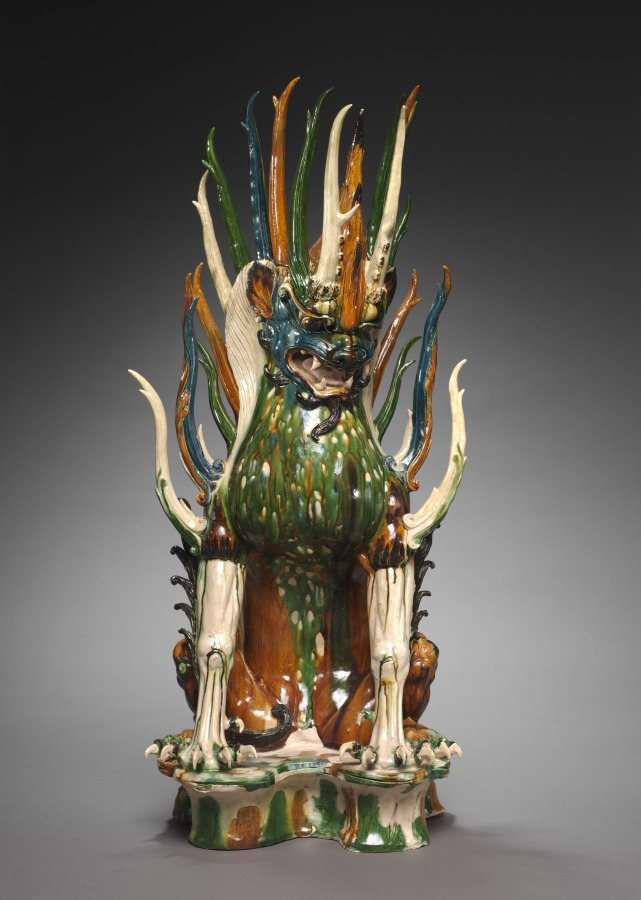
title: Tomb Guardians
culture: China, probably Shaanxi province, Xi'an, Tang dynasty (618-907)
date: early 700s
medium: glazed earthenware, sancai (three-color) ware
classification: Ceramic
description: With fierce expressions, elongated spikes, and exaggerated physical features, these two fantastic creatures were intended to guard the entrance to a tomb, warding off evil as well as keeping the soul of the deceased from wandering. Known as qitou, or earth spirits, both sculptures differ in appearance: one has an animal face, claws, and a pair of antlers; the other sports a human face with huge ears, hooves, and a short horn.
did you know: Sancai (three-color) glazes in green, amber, and transparent white, plus expensive cobalt blue glaze, show the high social status of the tomb’s occupant.